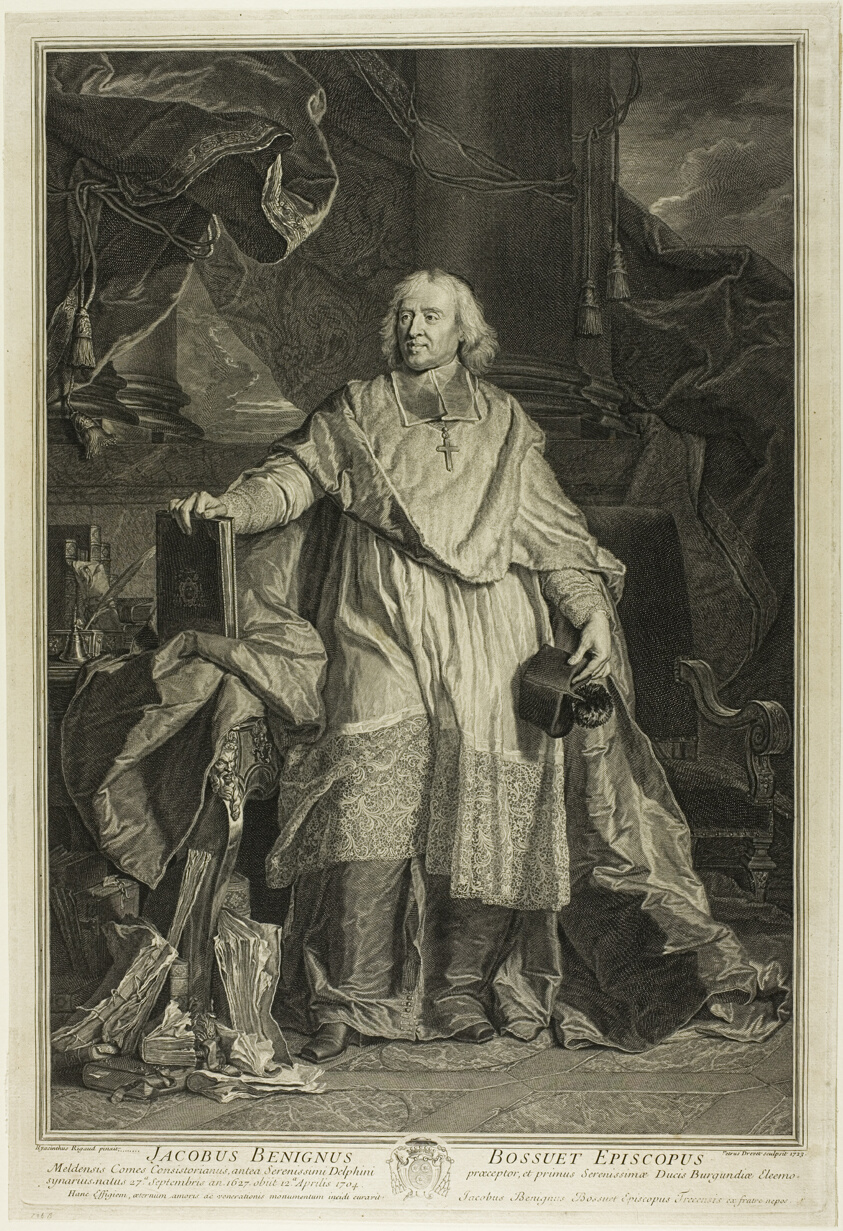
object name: Print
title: Portrait of Jacques Bénigne Bossuet, Bishop of Meaux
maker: Pierre-Imbert Drevet (French, 1697-1739); after Hyacinthe Rigaud (French, 1659-1743)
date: 1723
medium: Engraving on ivory laid paper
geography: France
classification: engraving; print; prints and drawing